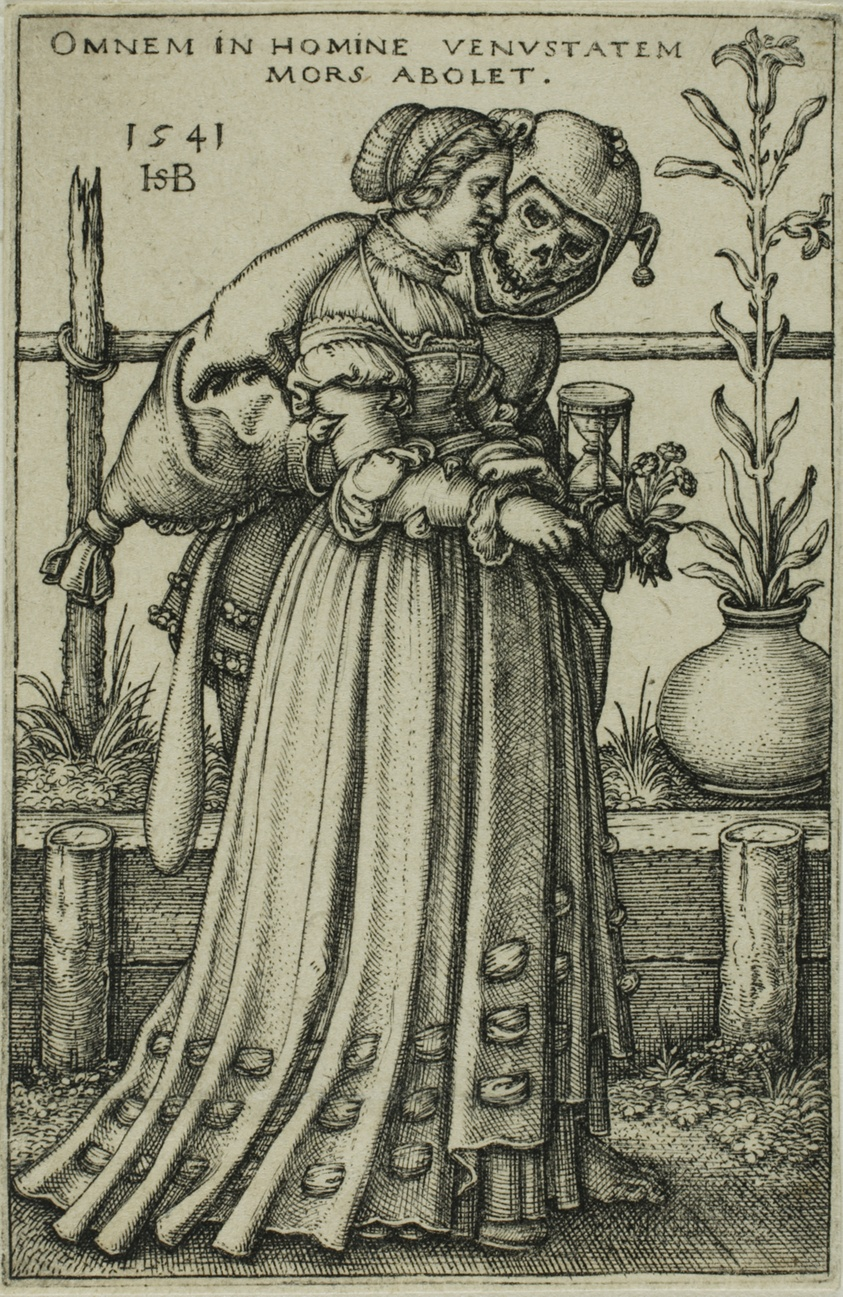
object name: Print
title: The Lady and Death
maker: Sebald Beham; German, 1500-1550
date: 1541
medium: Engraving in black on ivory laid paper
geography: Germany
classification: engraving; print; prints and drawing